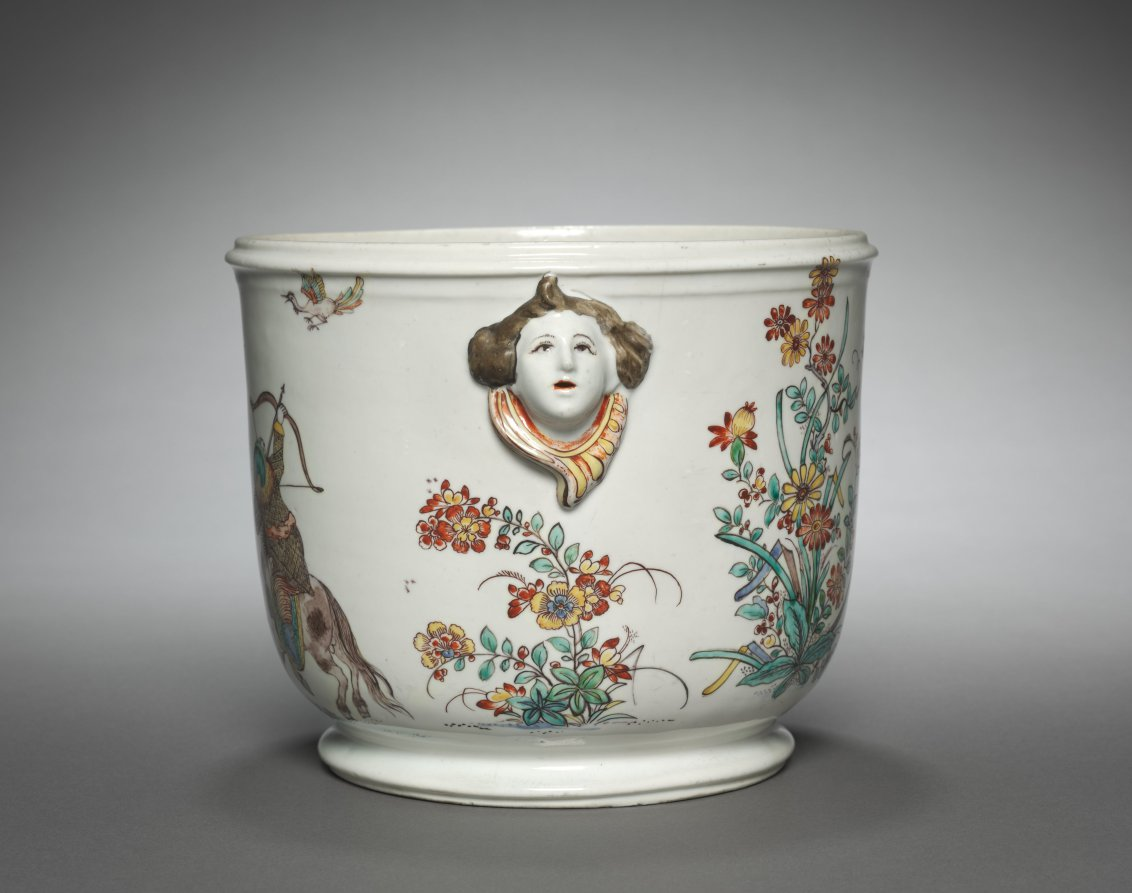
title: Bottle Cooler (seau a bouteille)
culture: France, Mennecy, 18th century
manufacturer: Mennecy- Villeroy Factory (French)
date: c. 1755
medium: Tin-glazed soft-paste porcelain with enamel decoration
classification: Ceramic